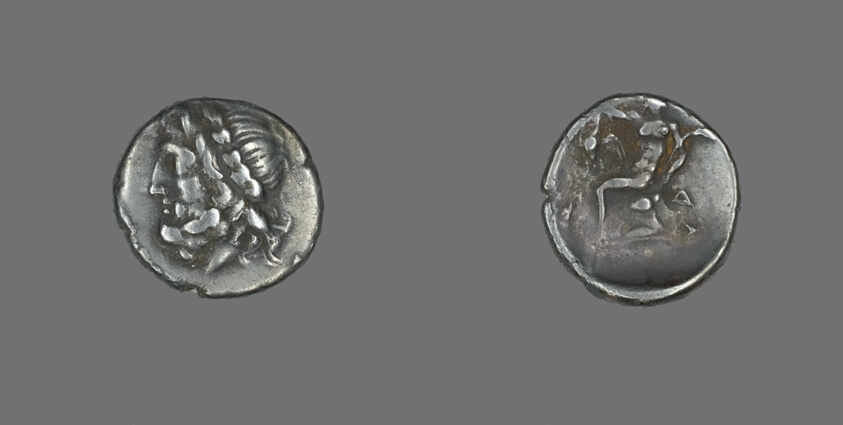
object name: Coin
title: Hemidrachm (Coin) Depicting the God Zeus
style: greek, ancient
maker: Greek, minted in Megalopolis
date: late 4th century BCE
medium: Silver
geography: Megalópolis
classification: coin; ancient art